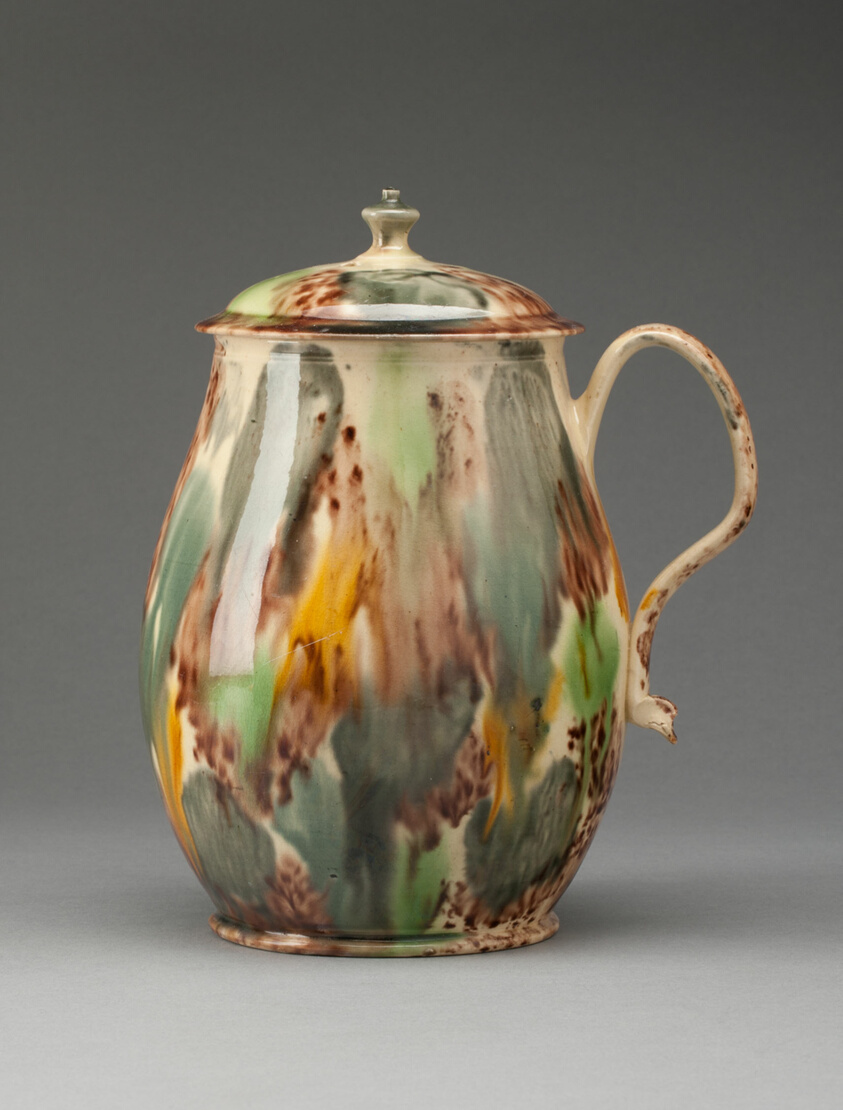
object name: Ceramics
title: Tankard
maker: Staffordshire, England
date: 1760/70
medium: Lead-glazed earthenware (creamware)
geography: Staffordshire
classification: drinking vessel; ceramics; creamware; european decorative arts; lead-glazed earthenware; earthenware